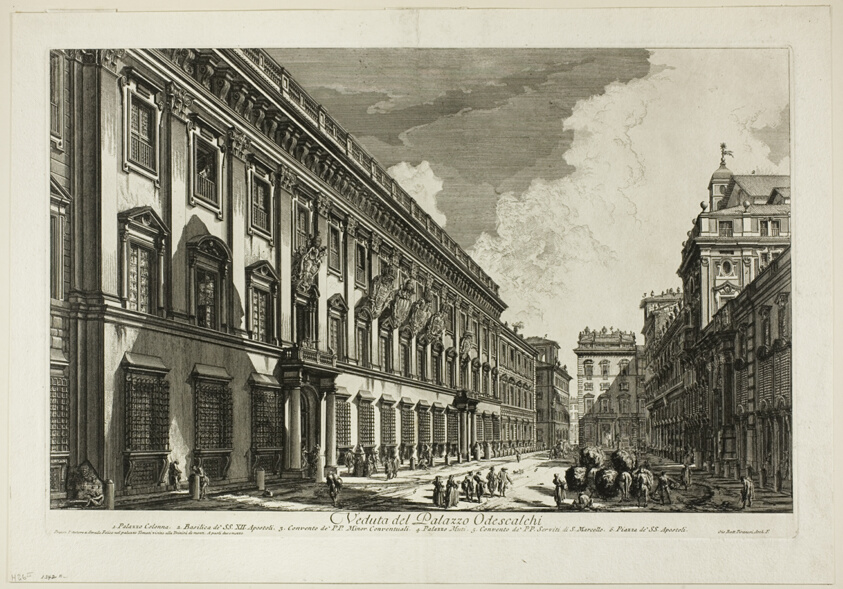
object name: Print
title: View of the Palazzo Odescalchi, from Views of Rome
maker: Giovanni Battista Piranesi (Italian, 1720-1778)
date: 1750/59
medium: Etching on heavy ivory laid paper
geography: Italy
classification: etching; print; prints and drawing